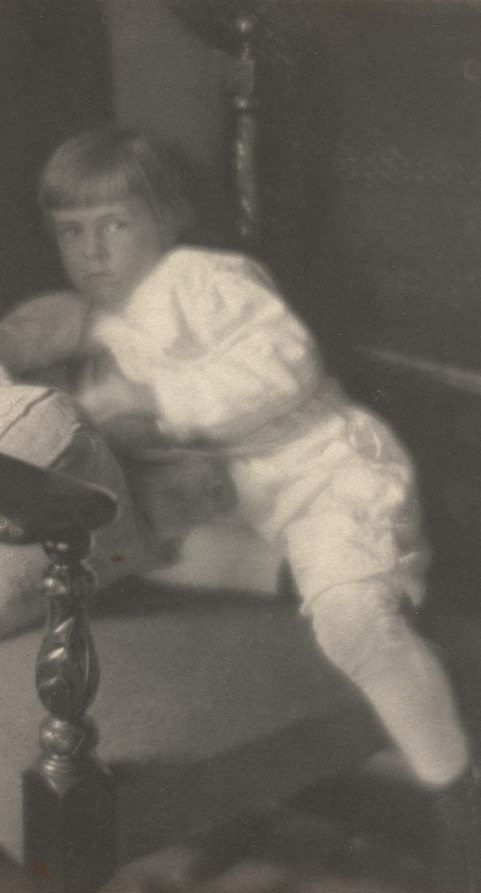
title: John Flory and Rabbit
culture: America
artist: Clarence H. White (American, 1871–1925)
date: 1915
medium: platinum print with pencil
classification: Photograph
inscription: Written in red ink on recto of photo: "CHW"; in pencil on recto of original mount: "Clarence H. White [signed] '15"